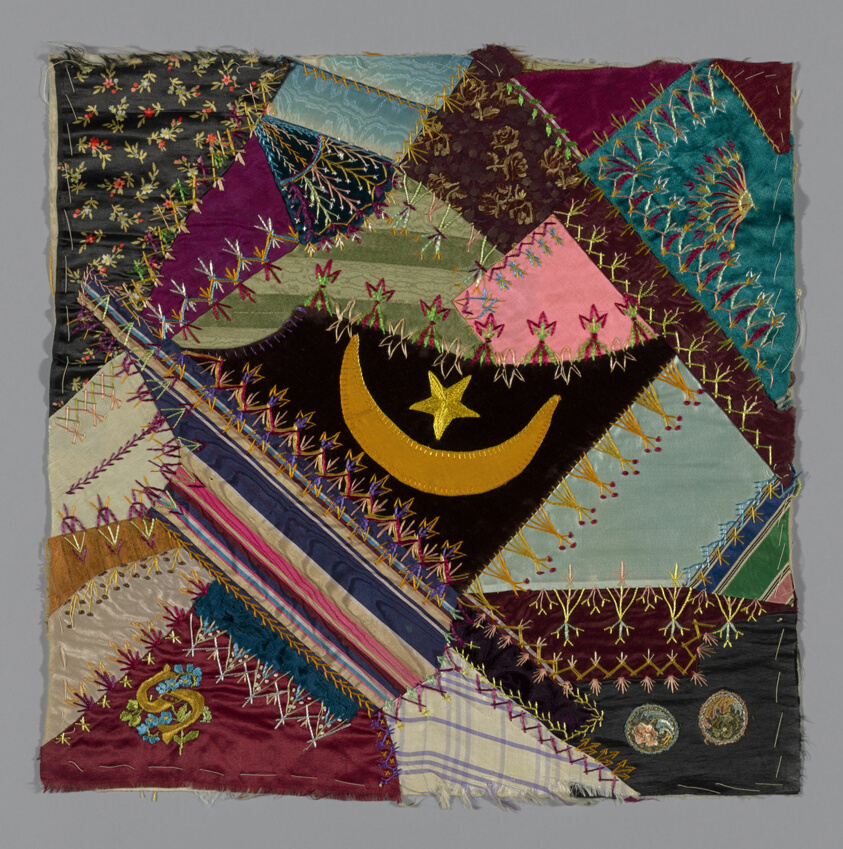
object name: Textile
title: Fragment from Bedcover (Crazy Quilt Block)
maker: United States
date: c. 1884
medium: Silk, tabby, satin, velvet & twill weaves. some have warp-face, extra pattern wefts, printing, or moiré pattern, cisele velvet Embroidered in silk floss & 2 ply twist. (Backed with tabby cotton after piecing.) Embroidery thru 3 layers Stitches: Herrinbone, feather, buttonhole, cross, satin, fishbone knot, & variations with line stitch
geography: United States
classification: needlework - quilt; textile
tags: star, fans, flowers, moon, stripes